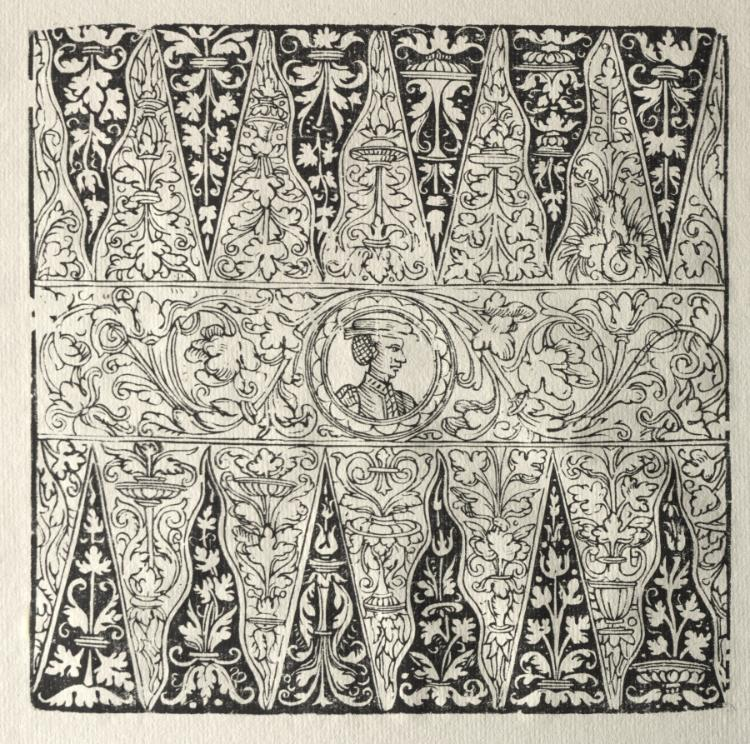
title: Puffspiel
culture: Germany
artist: Peter Flötner (German, 1485–1546)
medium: woodcut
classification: Print